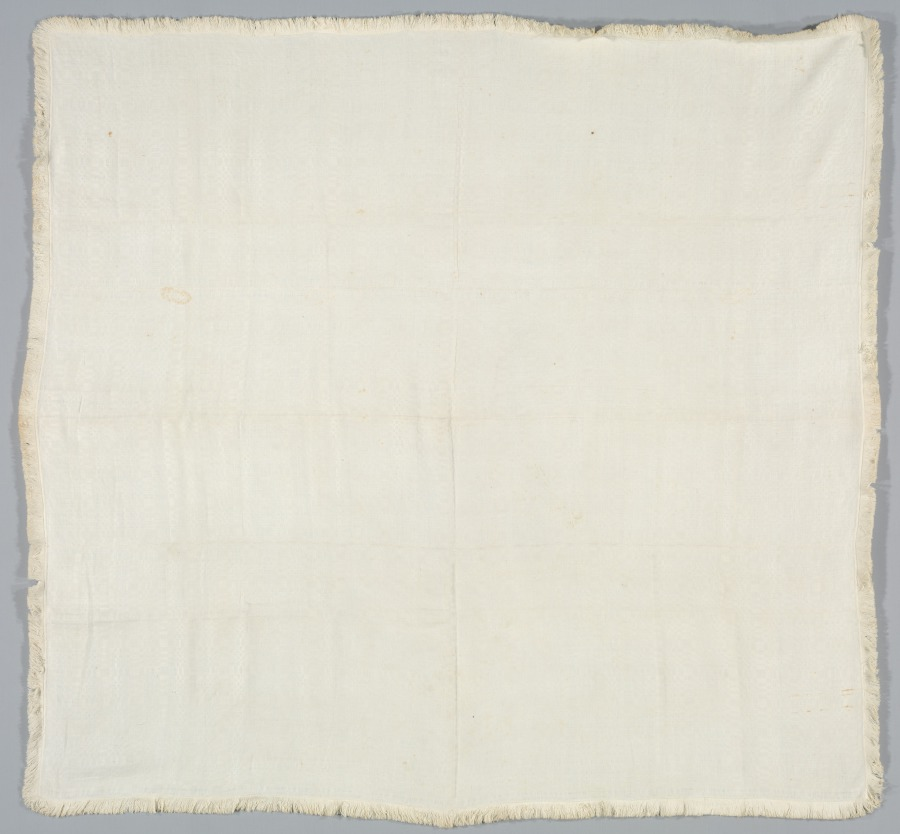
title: Tablecloth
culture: America, Connecticut, early 19th Century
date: c. 1800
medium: linen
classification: Textile